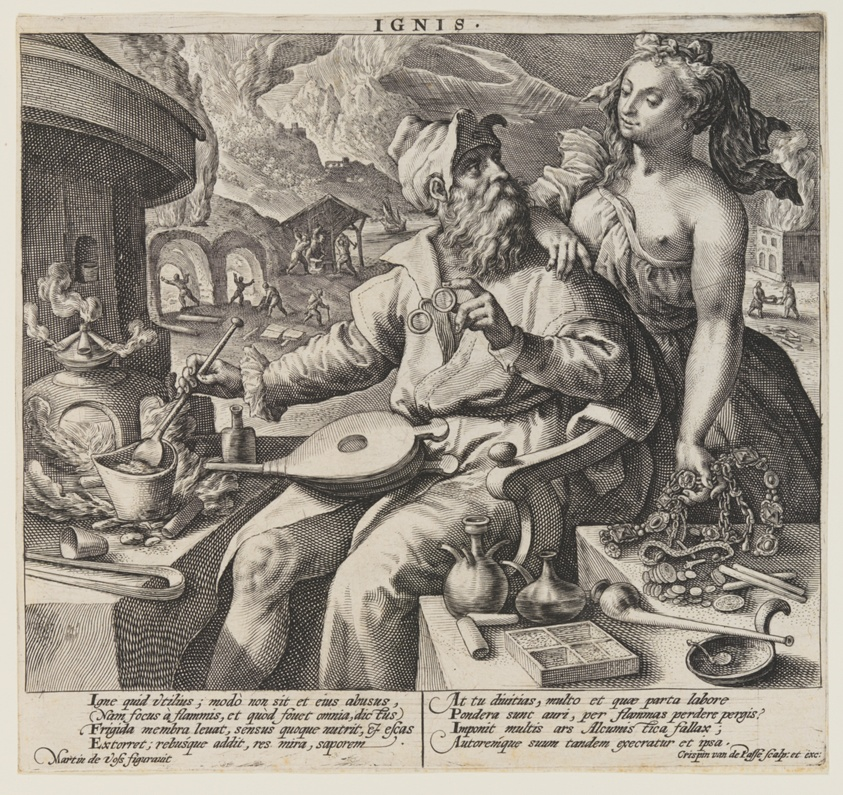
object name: Print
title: Ignis (Fire), from The Elements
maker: Crispijn van de Passe I (Dutch, c. 1565–1637); after Maerten de Vos Maarten de Vos (Flemish, 1532–1603)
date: c. 1600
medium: Engraving on ivory laid paper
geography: Netherlands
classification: engraving; paper; print; prints and drawing